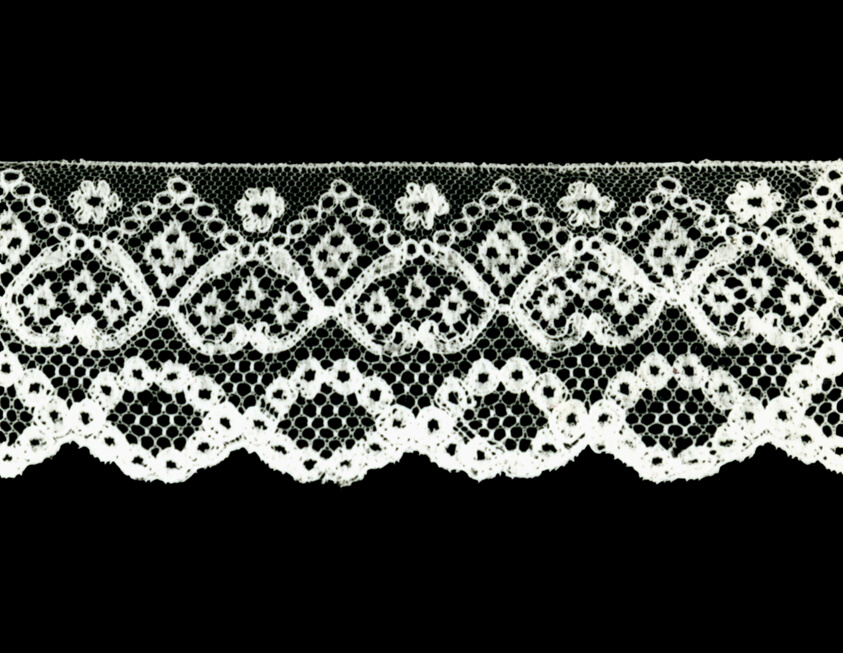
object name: Textile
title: Border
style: regency, european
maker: Denmark, Tønder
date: 1850/75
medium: Cotton and linen, bobbin straight lace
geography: Denmark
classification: textile; lace - bobbin